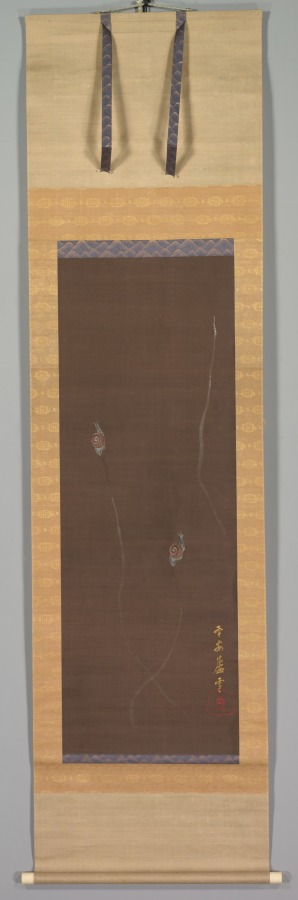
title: Snails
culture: Japan, Edo period (1615–1868)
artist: Nagasawa Rosetsu (Japanese, 1754–1799)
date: c. 1788–89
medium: Hanging scroll; ink, color, and metallic pigments on paper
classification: Painting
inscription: Inscription: 平安蘆雪; Inscription transliteration: Heian Rosetsu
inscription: Sealed: 魚; Seal transliteration: Gyo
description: In this work, Nagasawa Rosetsu carefully described two snails in a manner known as “earth painting” (doro-e), building up colors mixed with crushed white shells in emulation of the thick brushstrokes of oil paint seen in European painting. A silvery metallic pigment indicates the snails’ trails, glistening along an earthen wall. Notably, one trail has no snail, leaving the viewer to guess why.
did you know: Rosetsu was an independent painter active in Kyoto, Japan's cultural capital, known for his visual wit and superb range of technical skills.